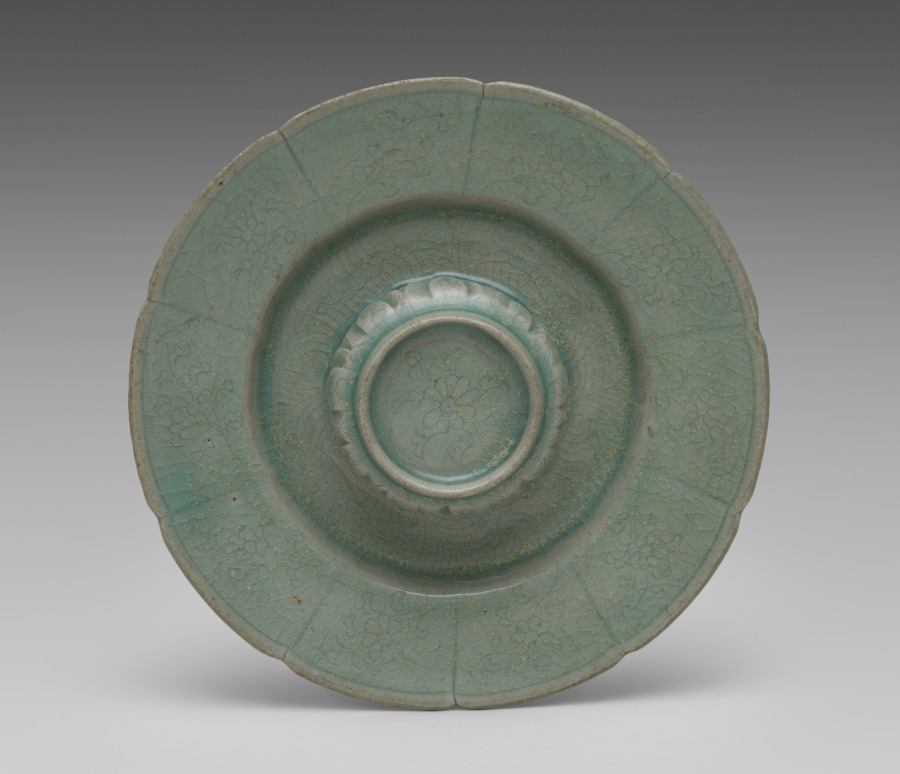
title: Floral-shaped Cup Stand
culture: Korea, Goryeo dynasty (918–1392)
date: 1200s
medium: pottery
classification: Ceramic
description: As early as the seventh century, the practice of drinking tea became an important part of elite culture in Korea. In enjoying teas, elites commissioned a variety of types of utensils and vessels including this delicate-looking cup stand, not only to make their tea-drinking experience more exciting, but also to show their refined taste.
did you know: Elites of the Goryeo period are known for their love of drinking tea and wine. This type of delicate-looking cup stands not only made their drinking experience more enjoyable, but also showed their refined taste.